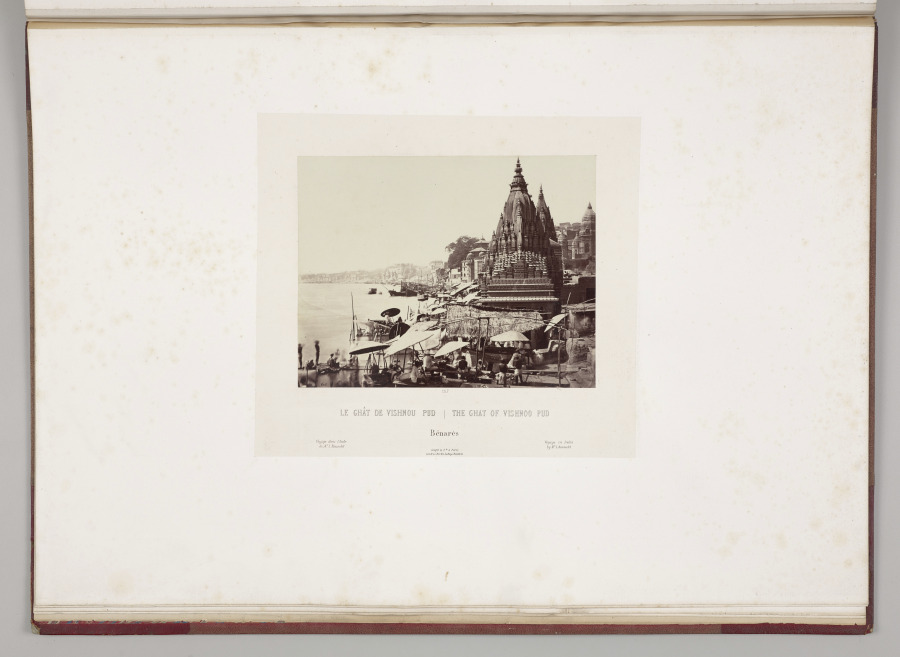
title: The Ghat of Vishnoo Pud, Bénarès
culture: France, 19th century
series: India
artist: Louis-Théophile Marie Rousselet (French, 1845–1929)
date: 1865–68, published 1869–70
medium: Albumen print from glass plate negative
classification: Photograph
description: Concerned that his drawings did not do justice to the splendor of India’s monuments, Rousselet learned photography in India that year, a remarkable accomplishment. He proved to be a talented photographer with a sophisticated sense of composition. The scenes in this volume sweep across sites of Sultanate, Rajput, and Mughal power in northern India, from the sacred Hindu city of Varanasi on the Ganges River to Alwar in Rajasthan. Also included are several scenes of industry and portraits of Indian rulers.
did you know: Louis Rousselet described himself as a “scientific traveler” when he went to India alone at age 18 in 1863 and stayed into 1868.